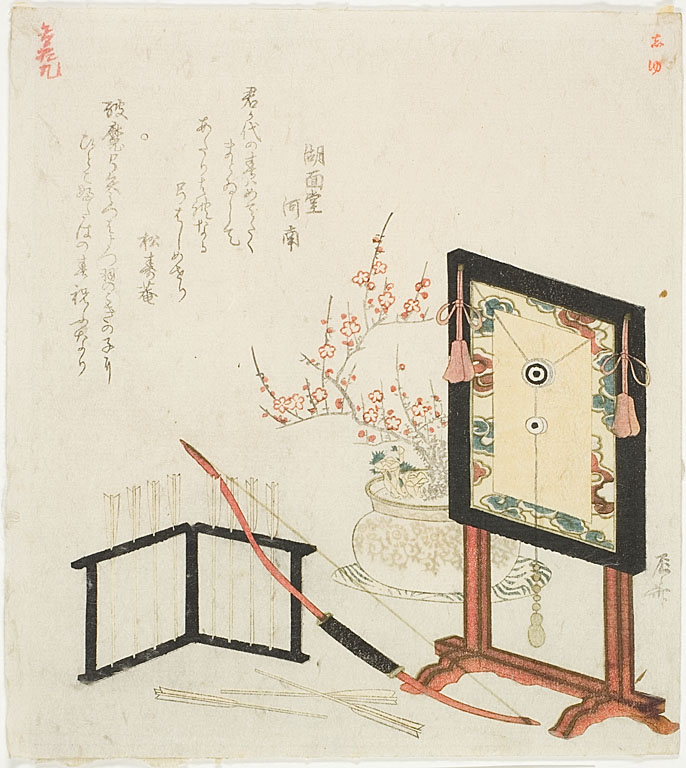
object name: Print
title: Target, Bow and Arrows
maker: Ryuryukyo Shinsai (Japanese, c. 1764-1820)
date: early 19th century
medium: Color woodblock print; surimono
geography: Japan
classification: woodblock print; print; asian art